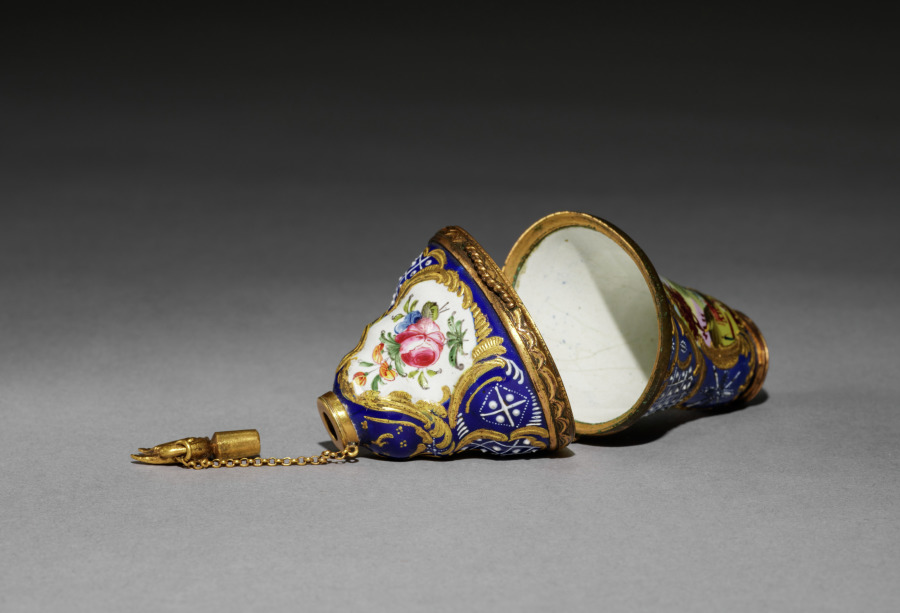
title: Scent Bottle and Box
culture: England, Staffordshire, 18th century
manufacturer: Staffordshire Factory (British)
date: 1750–1775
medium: enamel on copper with metal mounts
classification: Miscellaneous